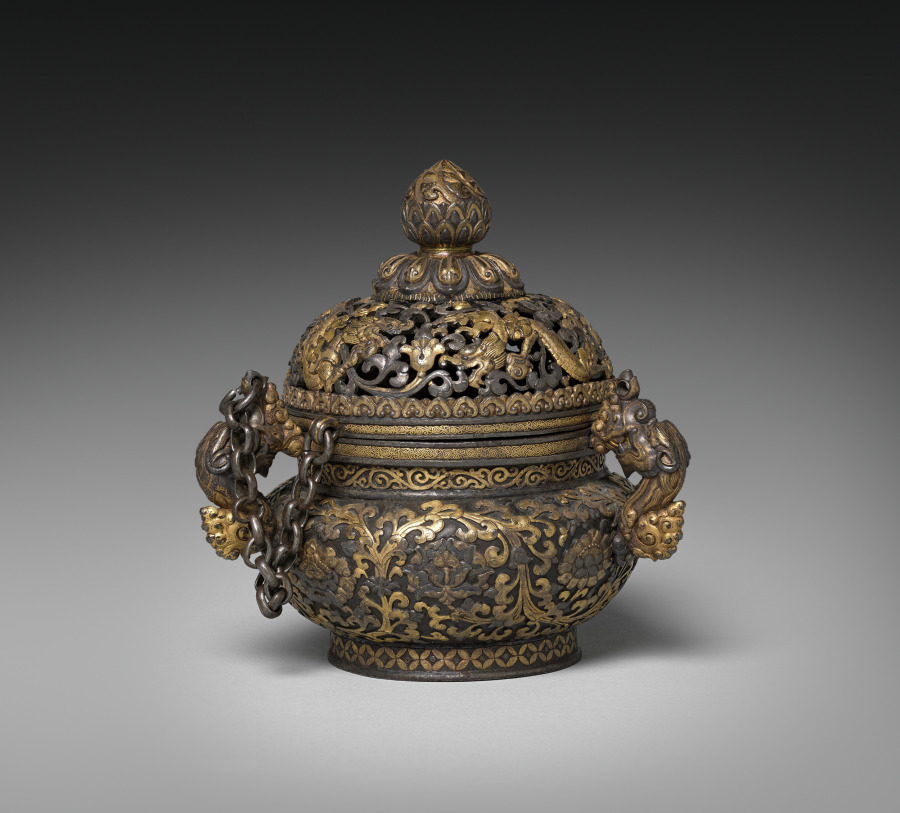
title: Incense Burner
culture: China, Yongle Period (1403-1424)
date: early 1400s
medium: iron inlaid with gold and silver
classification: Metalwork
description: This incense burner with gold and silver inlay has three dragon-head handles. Its main body is decorated with flowers placed in round fields formed by a winding creeper. The perforated cover is decorated with a dragon. The lotus bud on the top is used as a handle.